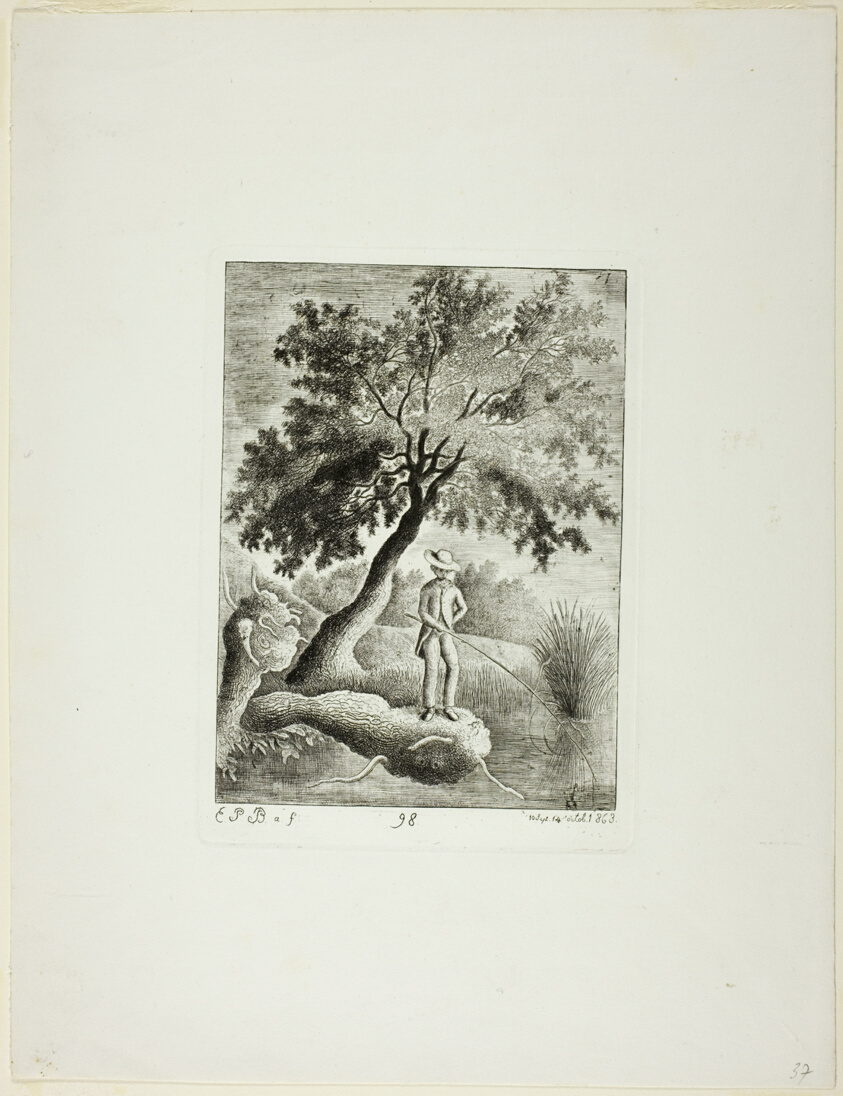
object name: Print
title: The Fisher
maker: Emmanuel Phelippes-Beaulieu (French, 1829-1874)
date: 1863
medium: Etching, with roulette and drypoint, on white wove paper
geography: France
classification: etching; print; prints and drawing